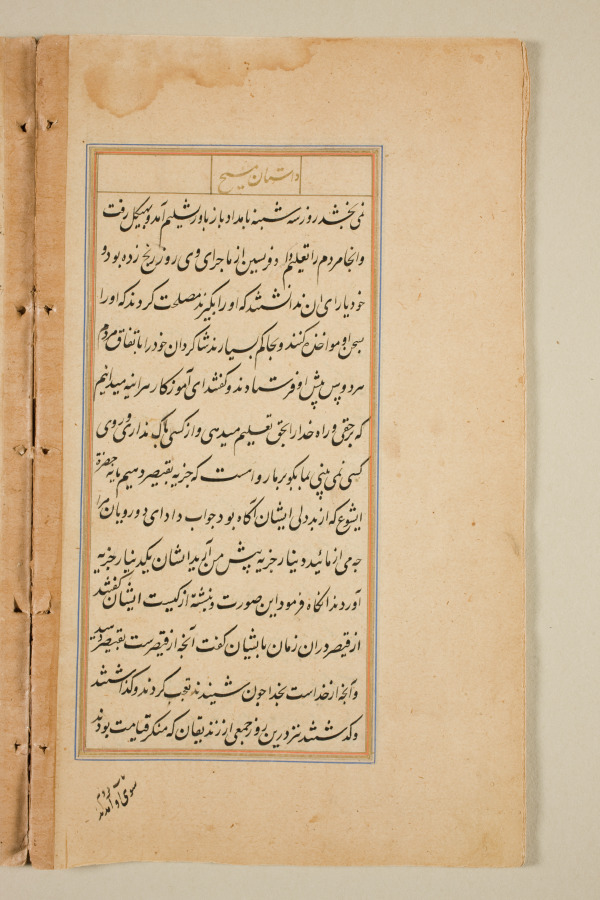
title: Text page from a Mirror of Holiness (Mir’at al-quds) of Father Jerome Xavier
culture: Mughal India, Allahabad, made for Prince Salim (1569–1627)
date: 1602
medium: Ink and gold on paper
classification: Manuscript